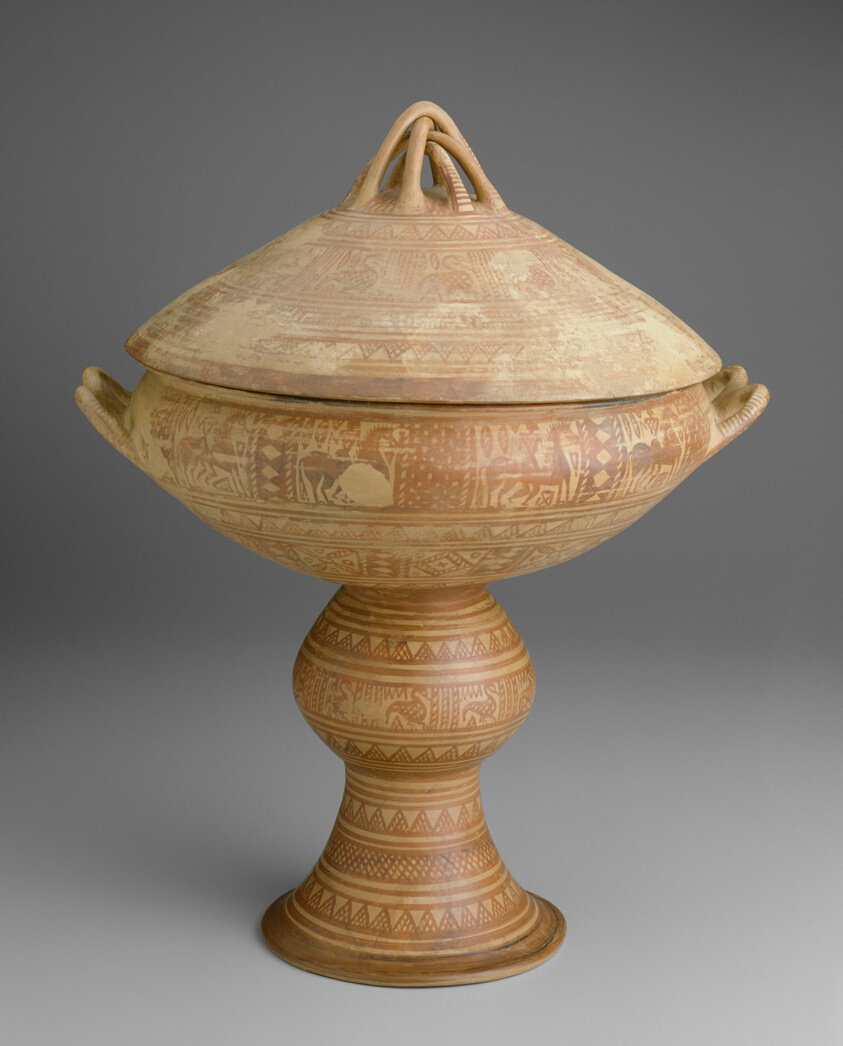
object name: Vessel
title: Lebes (Stemmed Bowl with Lid)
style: etruscan, ancient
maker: Etruscan; possibly Vulci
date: 725-700 BCE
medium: terracotta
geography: Etruria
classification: bowl; earthenware; dish (vessel); ceramics; vessel; ancient art